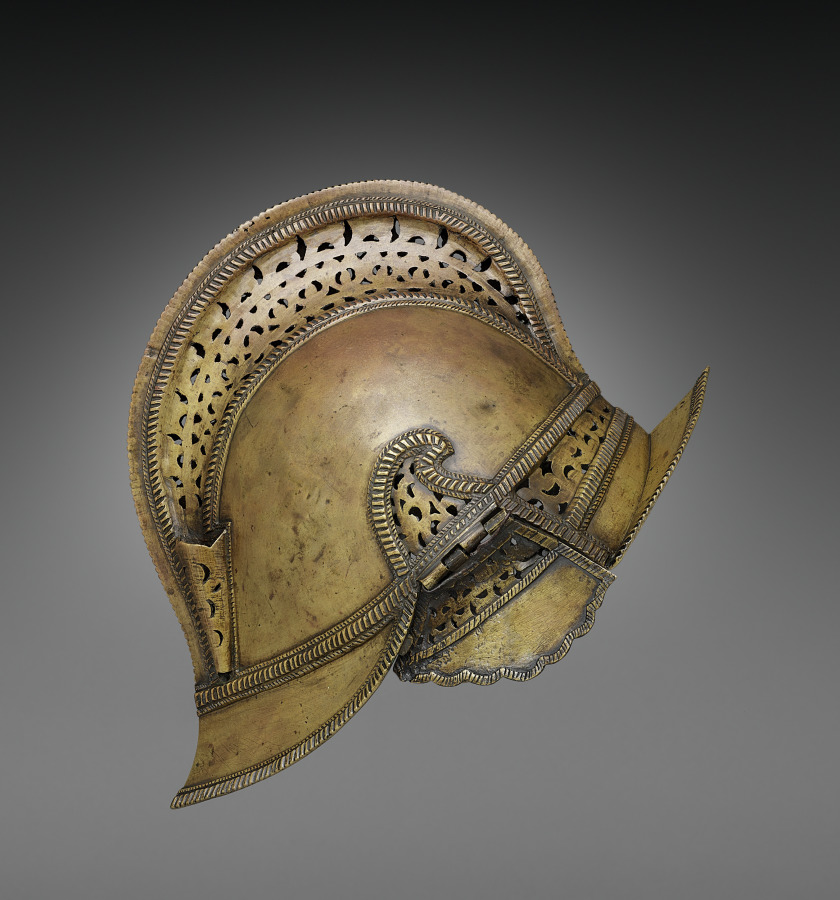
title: Helmet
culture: Philippines, Mindanao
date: 1800s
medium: Brass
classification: Arms and Armor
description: The predominantly Muslim Maranao people of the southern Philippines developed a rich material culture—including brass work, textiles, weaponry, and architecture—commonly featuring a curvilinear, geometric ornament known as okir. This helmet, while based on Spanish types, features filigree vents and openwork embellishment that are distinctively Mindanao. The top might once have been decorated with feathers or other ornaments.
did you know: Bacolod, the traditional homeland of the Maranao people, is a historic pangampong (fortified settlement) on Lake Lanao.